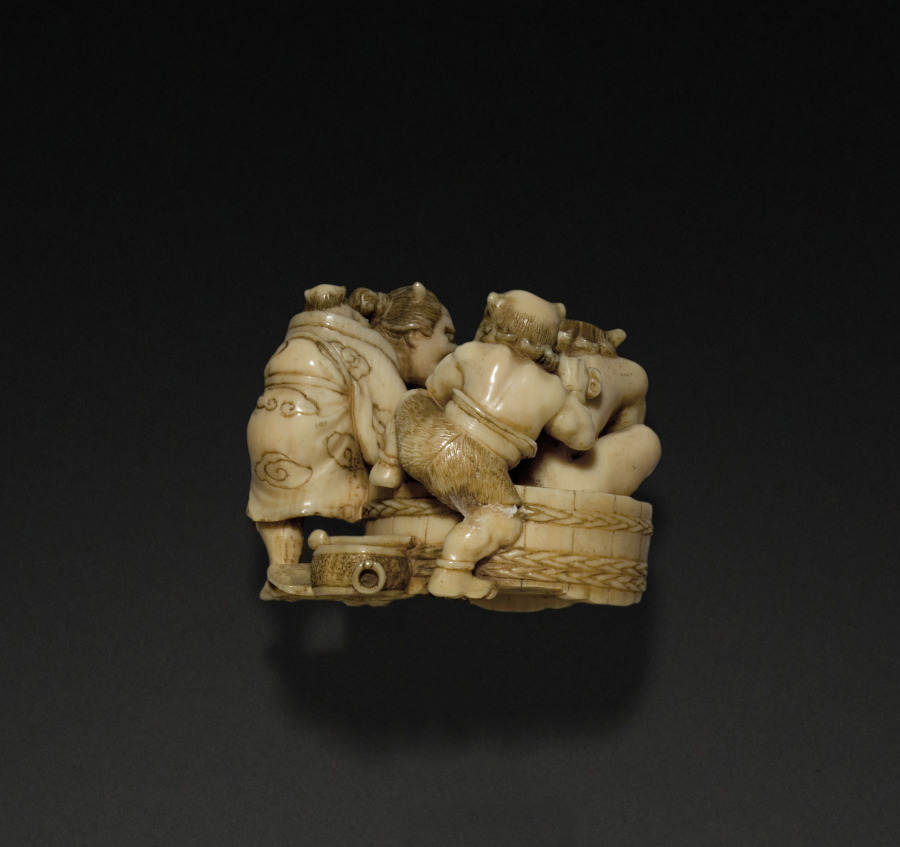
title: Netsuke with Demon Bathing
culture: Japan, Meiji period (1868–1912)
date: c. 1890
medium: ivory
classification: Netsuke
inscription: Signed: 玉秀